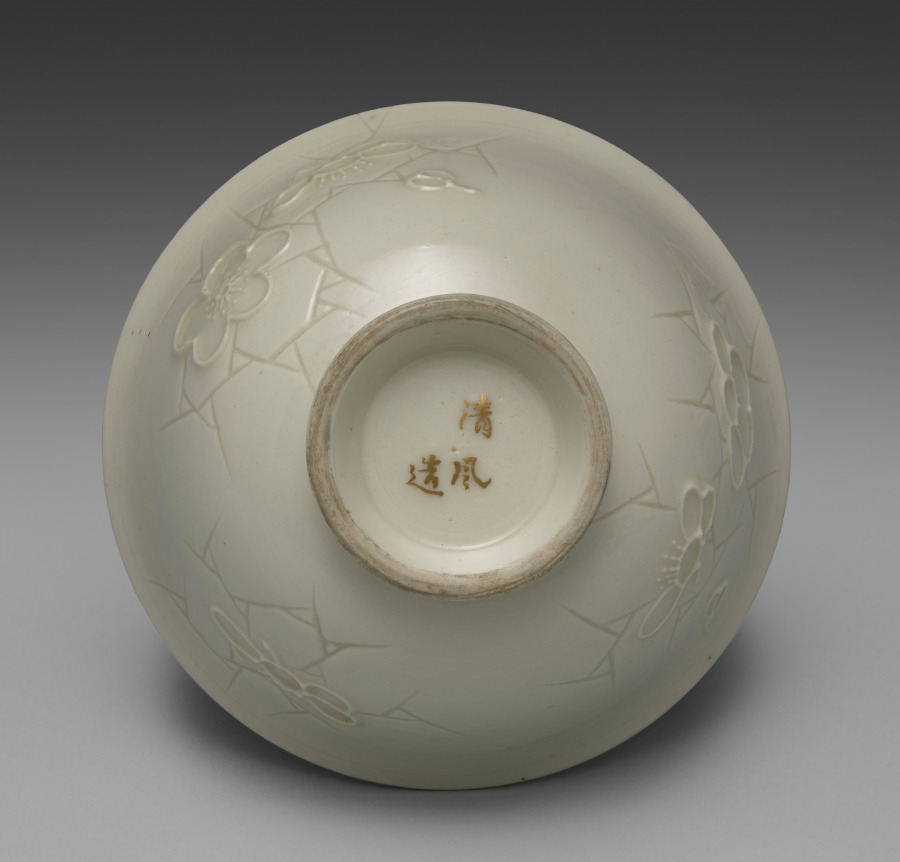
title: Bowl from Dining Set with Plum Blossoms and Cracked-Ice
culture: Japan, Meiji period (1868–1912)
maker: Seifū Yohei II (Japanese, 1844–1878)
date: c. 1875–78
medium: Porcelain with molded designs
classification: Ceramic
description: Each item in this set has a delicate low-relief design of flowering plum branches over scattered, intersecting lines meant to resemble the cracked-ice surface of a frozen body of water and is signed on the base in gold pigment. While Yohei II produced many fine works in underglaze blue, like those produced by Kiyomizu Shichibei, he also made works in quite different styles later in his career, from the early 1870 s. In 1873, he was appointed purveyor to the Industrial Center of Kyoto Prefecture, a designation associated with Kyoto’s efforts to reach an international market through the port of Kobe; and from 1875 until his death, he was involved in national-level projects to present Japanese ceramics across the world. It was during this period that Yohei III was apprenticed to Yohei II, and it has been suggested that this set may in fact be an early example of Yohei III’s work, which he signed with his teacher’s name. Decorated with flowers resembling Japanese textile motifs, the set calls to mind the design of Yohei II’s pair of vases with plum blossoms in the Victoria and Albert Museum. Here, the elaborate trees created for a formal public exhibition setting have been translated into the approachable blossoms of the genteel domestic environment. While the designs are consistent across the pieces, each raised flower petal and pistil and each incised line in the ice was done by hand, so the cups, bowls, and dishes are similar yet unique. The bottoms of two boxes once identified the set’s owner, but the information has been deliberately obscured with black ink. However, inscriptions still visible appear to indicate two occasions, once at the end of July 1886 , and once again in June 1916 , when parts of the set were requested from Hokura in Niigata Prefecture. The location corresponds to a neighborhood in the present-day city of Jōetsu. The surname Tsuji 辻 also appears on a paper tag affixed to one of the box cloths. Future research may possibly reveal more about their provenance. A vase by Yohei III in a private collection combines the formal grandeur of the Yohei II vases in the Victoria and Albert Museum with the gentler design of this dining set, placing flowering plum trees against soft, scalloped-edge clouds resembling those in golden screens.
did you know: The dining wares have a creamy white coloration that the four boxes containing them identify as Korean in style.